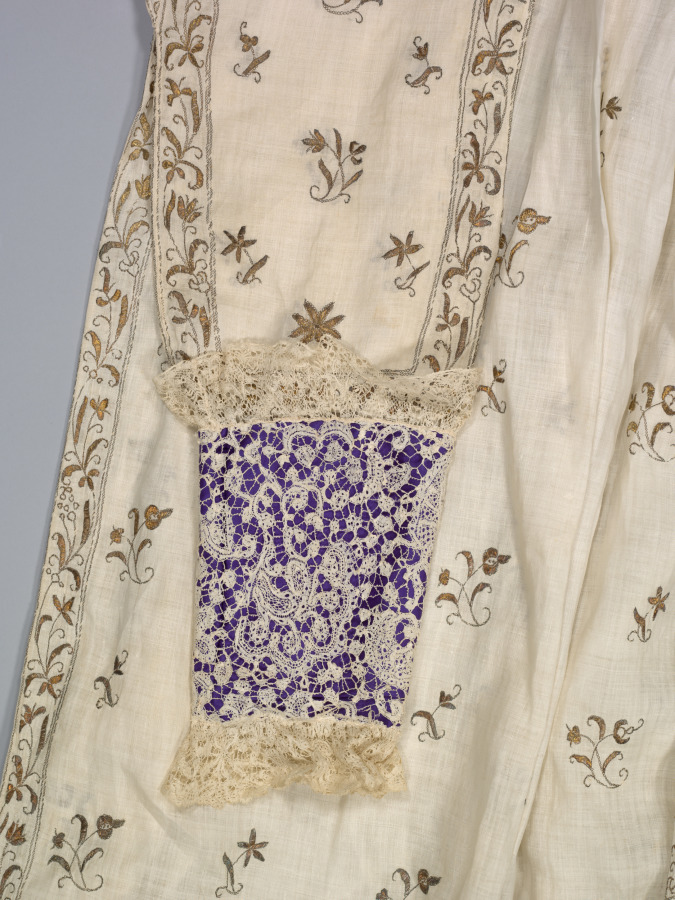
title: Alb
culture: Spain: embroidered linen; Flanders: bobbin lace (Point d’Angleterre) flounce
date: Embroidered Linen: 1600s; Bobbin Lace (Point d’Angleterre) Flounce: 1700s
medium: Plain weave linen embroidered in gold and silver; linen bobbin lace (Point d’Angleterre a Reseau)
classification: Garment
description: This beautiful vestment, called an alb, was worn under other liturgical garments by the clergy who served at the altar. Embroidered with gilt-metal thread flora on a linen ground, it is trimmed with a flounce and cuffs of lace, the most fashionable and expensive material at the time. Its purple silk lining indicates that it belonged to an archbishop. The exquisitely worked bobbin lace consists of two large composite floral designs flanked by popular curved forms on an elaborate bar ground that repeats ten times around the flounce.